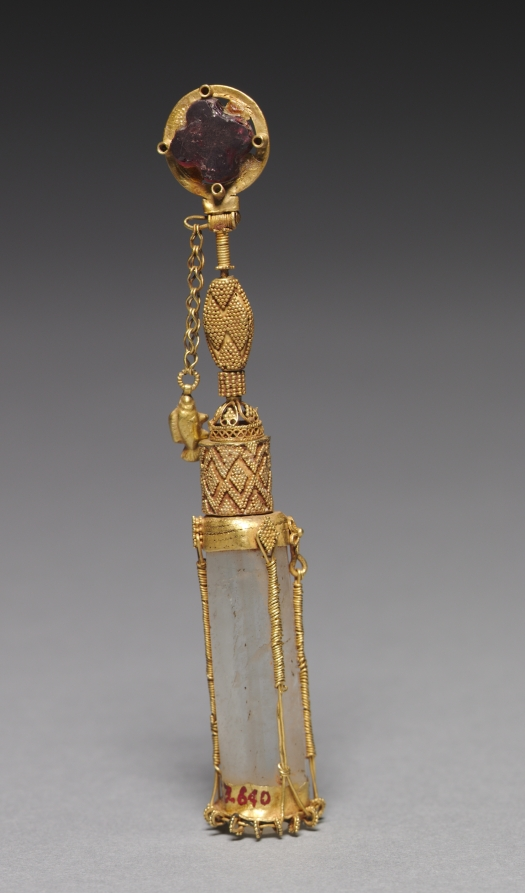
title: Mounted Rock Crystal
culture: Byzantium, Byzantine period, 6th-7th centuries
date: 500s-600s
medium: gold, quartz, almandine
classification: Metalwork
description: When this object was acquired, it was thought to be a container for holy oil or another sacred relic or substance. However, closer examination revealed that the rock crystal prism at the object’s core is completely solid, leaving no room in which to insert such matter. The object’s original function thus remains unclear. It may have served as an amulet, a magical object meant to protect its owner from evil and mishaps.